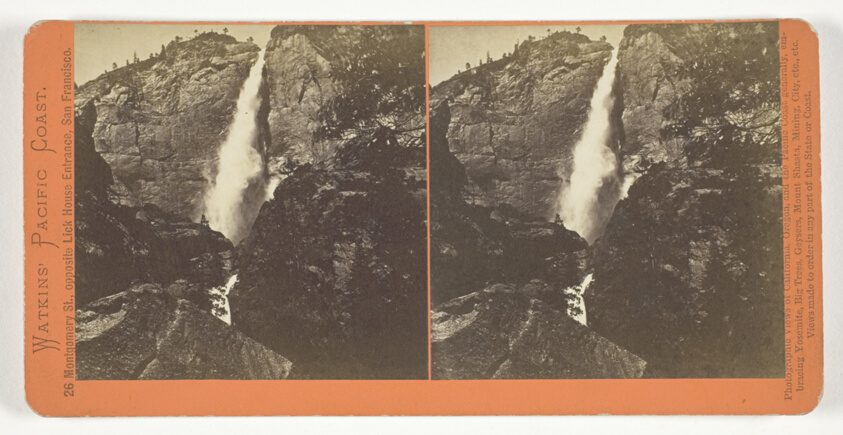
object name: Photograph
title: Yosemite Falls, 2630 ft., from the series "Watkins' Pacific Coast"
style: 19th century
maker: Carleton E. Watkins; American, 1829-1916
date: 1861/76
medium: Albumen print, stereo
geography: United States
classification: stereograph (albumen); albumen silver print; photographic process; photography; photograph